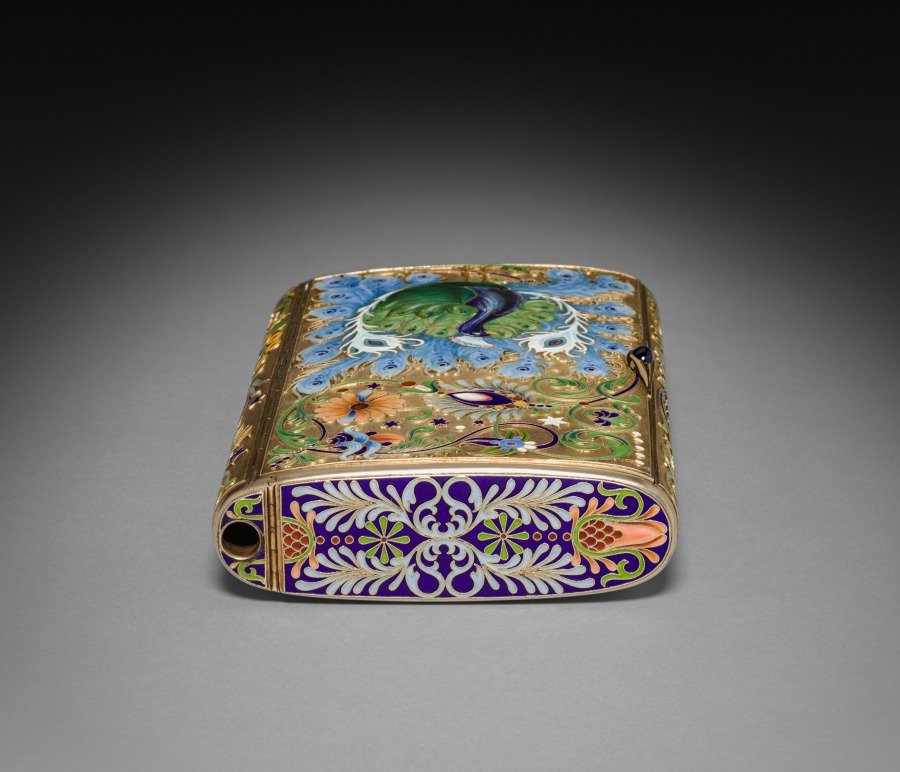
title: Cigar Box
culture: Russia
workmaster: attributed to Feodor Ivanovich Rückert (Russian, 1840–1917)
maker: House of Fabergé (Russian, 1842–1918)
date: c. 1896–1908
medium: Silver gilt, enamel, sapphire set in gold; [reproduction silk tinder cord, gold and moonstone catch]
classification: Silver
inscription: C. Fabergé (in Cyrillic); double-headed eagle [imperial warrant]; 84, Kokoshnik, tester's initials [assay mark for Moscow, 1896-1908]; scratched 16358.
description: Fabergé’s craftsmen in Moscow became known for their work in the pan-Slavic or neo-Russian taste, hearkening back to 17th-century styles of Russian folk decoration. In this whimsically oversized box for cigars or loose tobacco, Fabergé used the technique to highlight a symbol of imperial royalty, the preening peacock, here rendered in brilliant hues of blue and green enamels.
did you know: Peacocks were considered a symbol of imperial royalty in Russia.